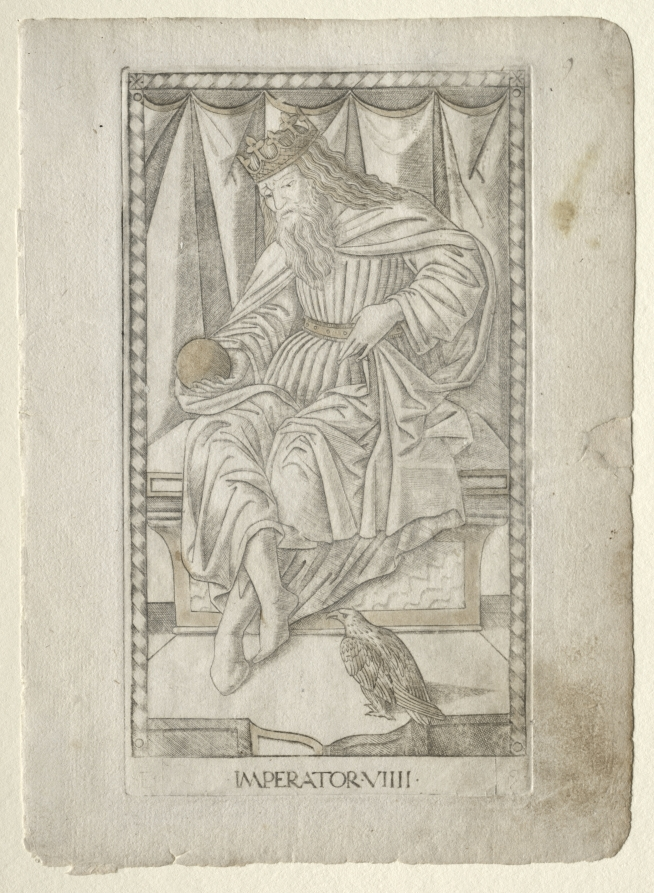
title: The Emperor (from the Tarocchi, series E: Conditions of Man, #9)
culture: Italy, Ferrara, 15th century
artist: Master of the E-Series Tarocchi (Italian, active 1460s)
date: before 1467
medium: engraving hand-colored with gold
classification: Print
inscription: Lettered below the image of Imperator (The Emperor): [·E·] / ·EMPEROR·VIIII / [·9·]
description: This engraving is part of the Tarocchi group marked with the letter “E,” and named Conditions of Man. This series outlines the social and hierarchical order of ten characters (Beggar, Servant, Artisan, Merchant, Gentleman, Knight, Doge King, Emperor, and Pope), starting from the lower grade and ending with the most important one. Here, Imperator (The Emperor) is shown as a full-length crowned male figure, turned to the left. The ruler is seated crossed-legged on his throne. He holds a globe in his right hand, while an eagle rests at his feet.